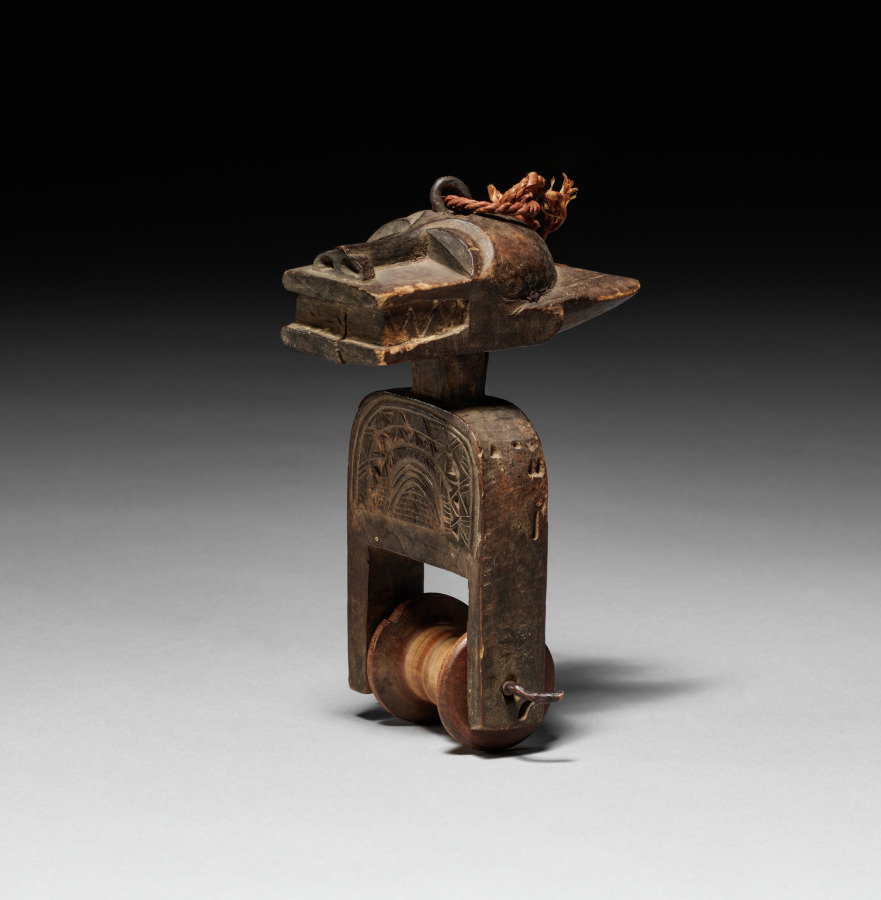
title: Heddle Pulley (Bo Nun Amuin mask)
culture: Africa, West Africa, Côte d’Ivoire, Baule-style carver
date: 1900s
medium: Wood, metal, and plant fiber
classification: Implements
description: The heddle pulley, a working element of a narrow-band loom, bears a miniature sculpture. Heddle pulleys support and separate threads during weaving. Mounted above the weaver, the pulleys allow him to glance up at an object of inspiring beauty, rather than pure functionality. This pulley depicts a face mask, a secular usage of a typically sacred mask type.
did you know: This heddle pulley depicts a fearsome Bo Nun Amuin mask that recalls nature spirits.